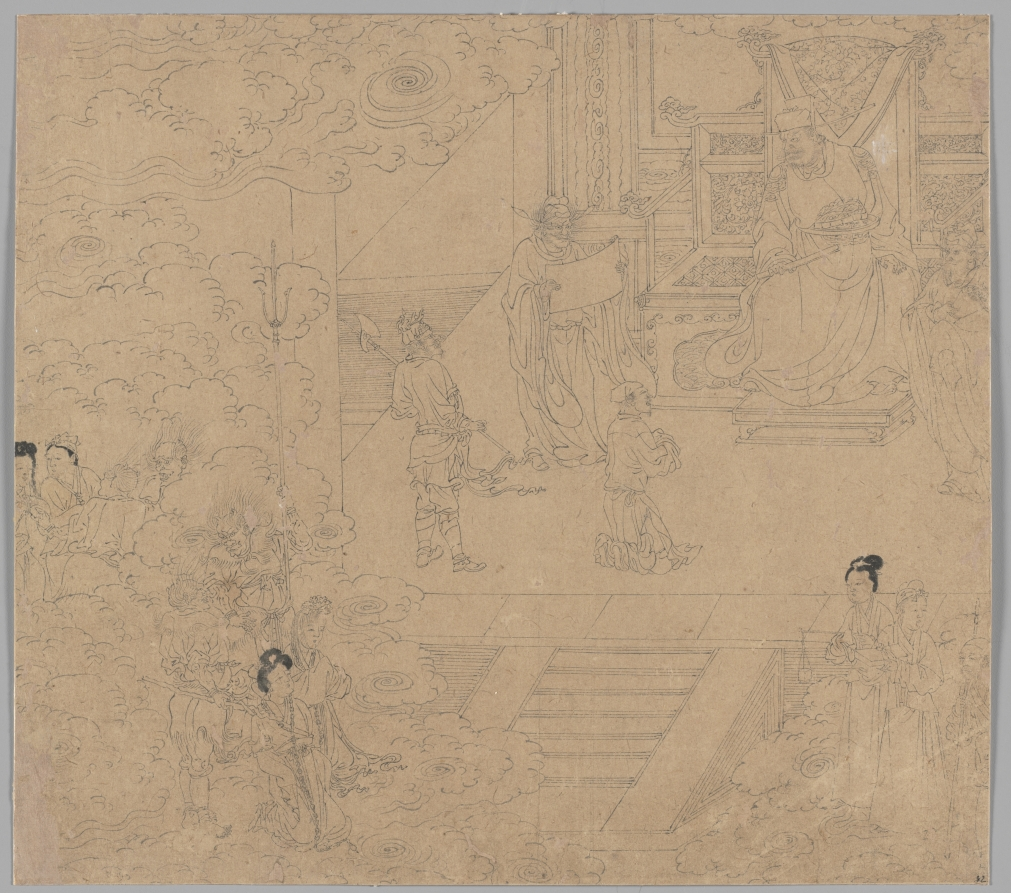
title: Album of Daoist and Buddhist Themes: Kings of Hells: Leaf 32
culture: China, Southern Song dynasty (1127-1279)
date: 1200s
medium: Album, ink on paper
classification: Painting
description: This extraordinary album has 50 paintings on a variety of religious subjects. They were likely created by several master craftsmen to share with studio apprentices as models for fulfilling commissions. The Jade Emperor and the Daoist pantheon make up the first 26 leaves. The next 14 leaves portray the Buddhist Ten Kings of Hell administering punishments to the dead. The third section, called “Clearing the Mountains,” features divine soldiers, led presumably by the deity Erlang Shen 二郎神, fighting undesirable creatures.